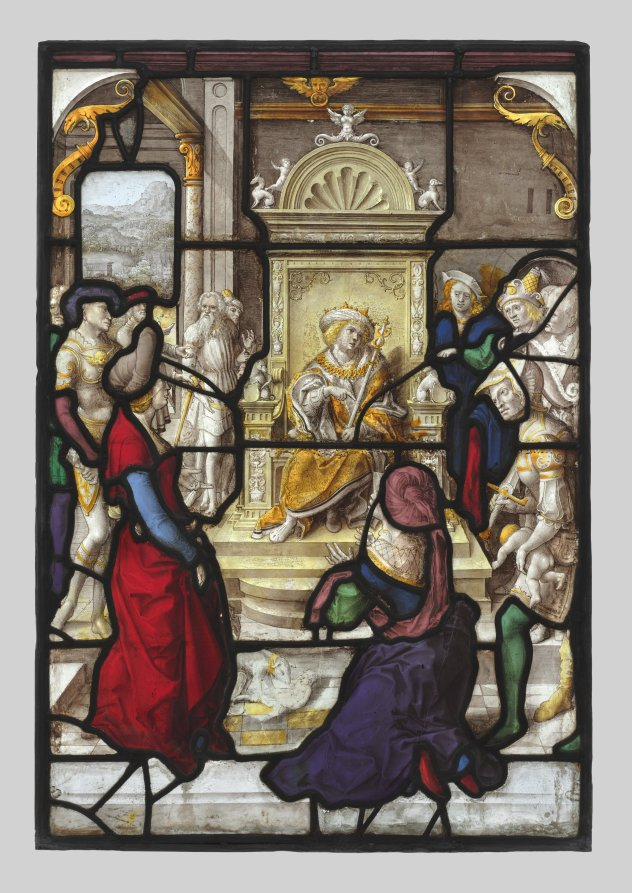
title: The Judgment of Solomon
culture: Netherlands, South Lowlands, 16th century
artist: Dirk Vellert (Netherlandish, 1480/85–1547)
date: c. 1530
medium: pot metal, white glass, and silver stain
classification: Glass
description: Though also a painter and printmaker, Dierick (or Dirk) Vellert is best known as a designer of stained glass. Active in Antwerp, where he became a master of the Guild of Saint Luke in 1511, Vellert richly ornamented his work with garlands, masks, vases, and other classically inspired motifs. A great deal of his glass was exported. As an engraver, his prints owe a good deal to Albrecht Dürer and Luca van Leyden. These two panels depict famous incidents from the Old Testament featuring the rendering of judgment. Both may have originally been made for a council chamber or a court of justice. Conceivably, because of their subjects, they could have served as models of justice for the magistrates who deliberated within view of them.